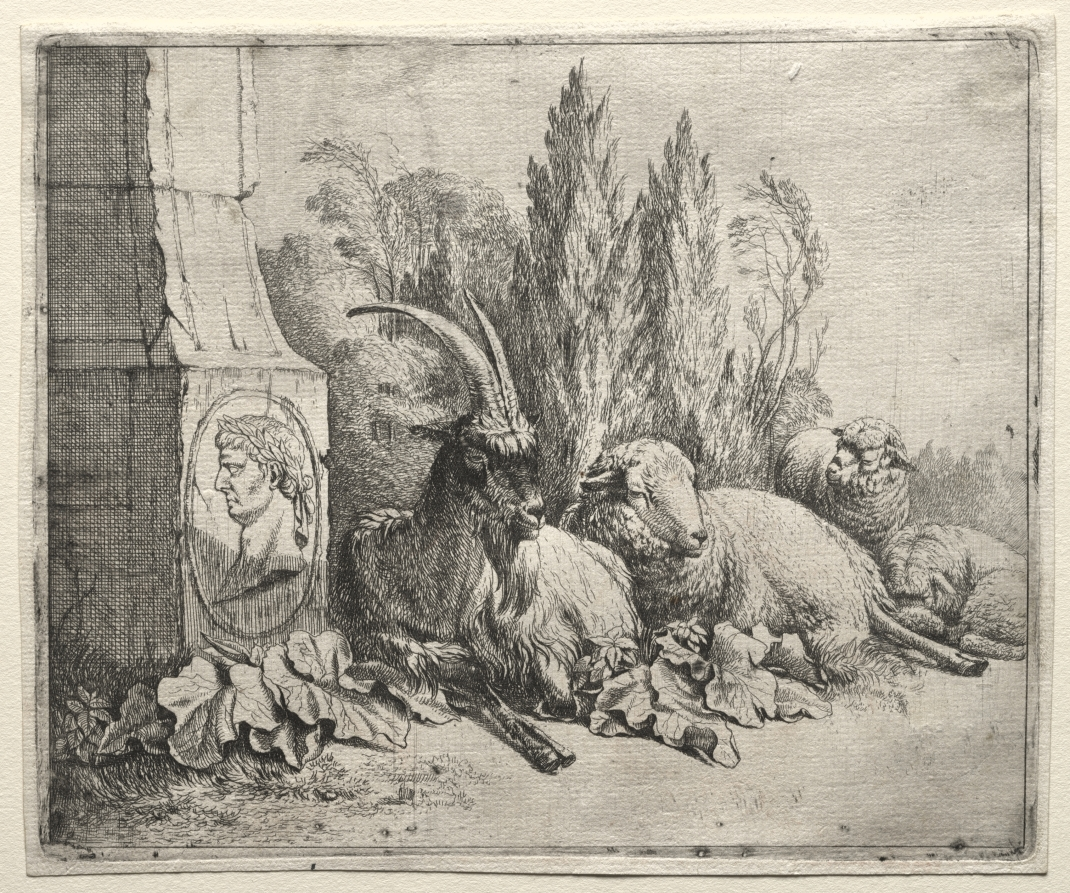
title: Bust at the Bottom of a Pyramid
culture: Germany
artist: Johann Heinrich Roos (German, 1631–1685)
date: 1665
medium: etching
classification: Print